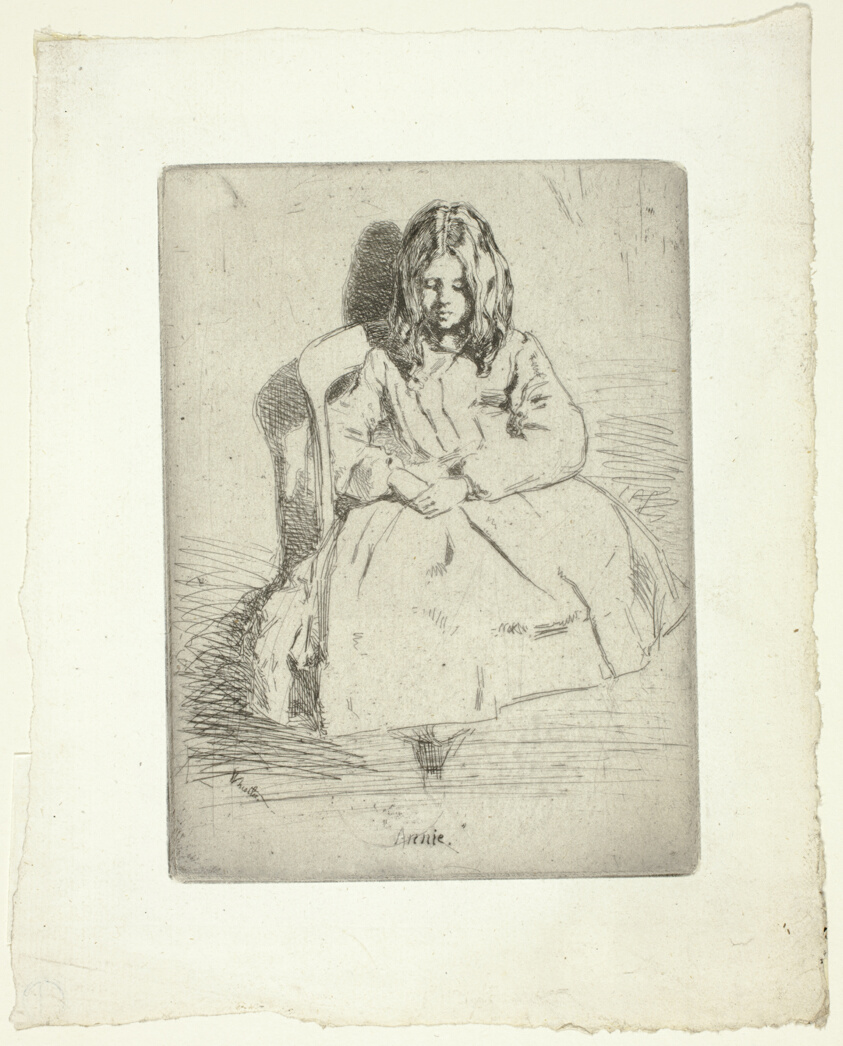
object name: Print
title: Annie, Seated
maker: James McNeill Whistler (American, 1834-1903)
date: 1858/59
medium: Etching and drypoint with foul biting in dark gray ink on ivory laid paper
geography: United States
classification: etching; foul biting; print; prints and drawing; paper; drypoint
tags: children